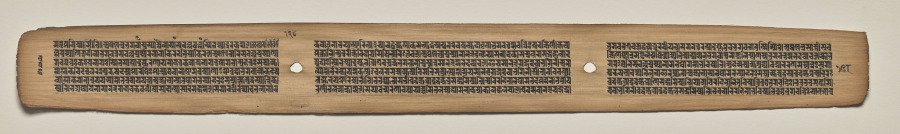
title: Text, Folio 128 (verso), from a Manuscript of the Perfection of Wisdom in Eight Thousand Lines (Ashtasahasrika Prajnaparamita-sutra)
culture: Eastern India, Bihar, Vikramashila Monastery. Painting: Nepal, Kathmandu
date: Sunday, September 14, 1119 (year 239 of the Newar Samvat in the month of Ashvina)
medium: gum tempera and ink on palm leaves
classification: Painting